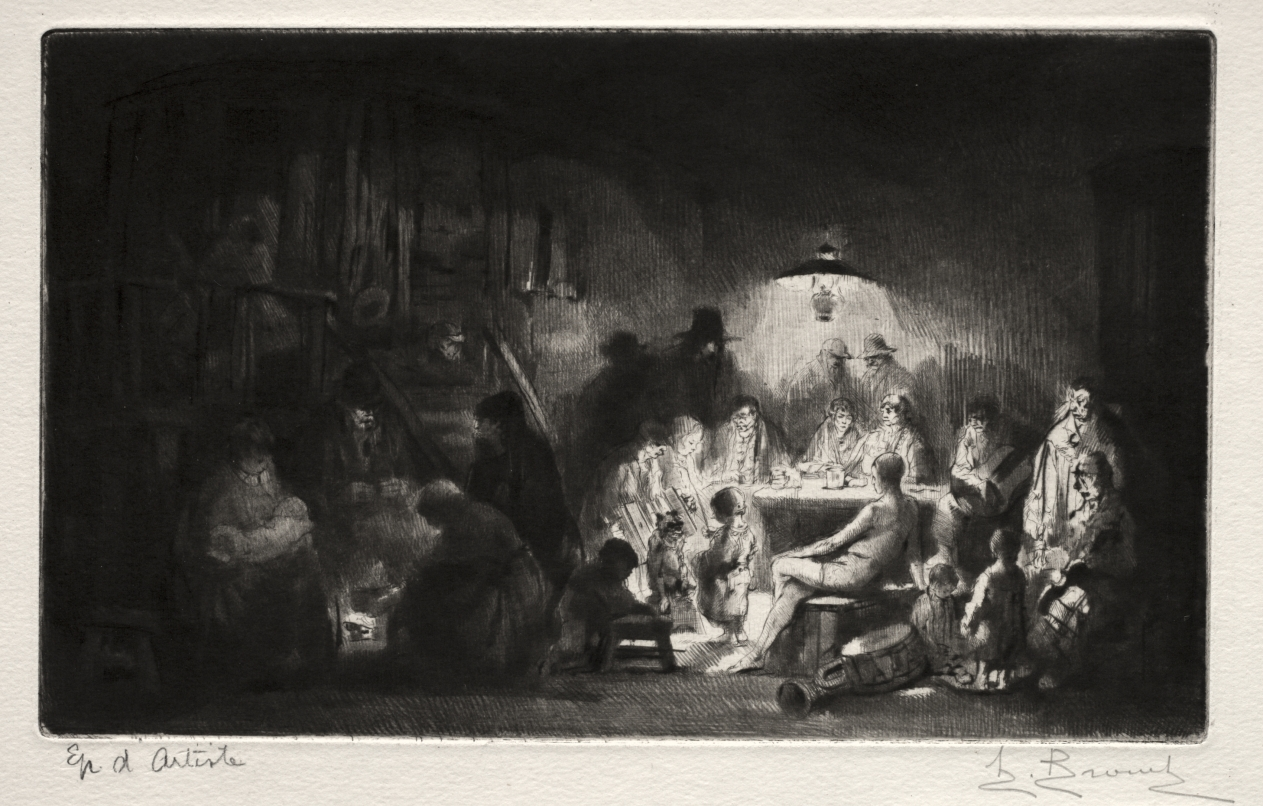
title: The Franconian Circus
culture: France, 20th century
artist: Auguste Brouet (French, 1872–1941)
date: before 1925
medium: etching and roulette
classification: Print